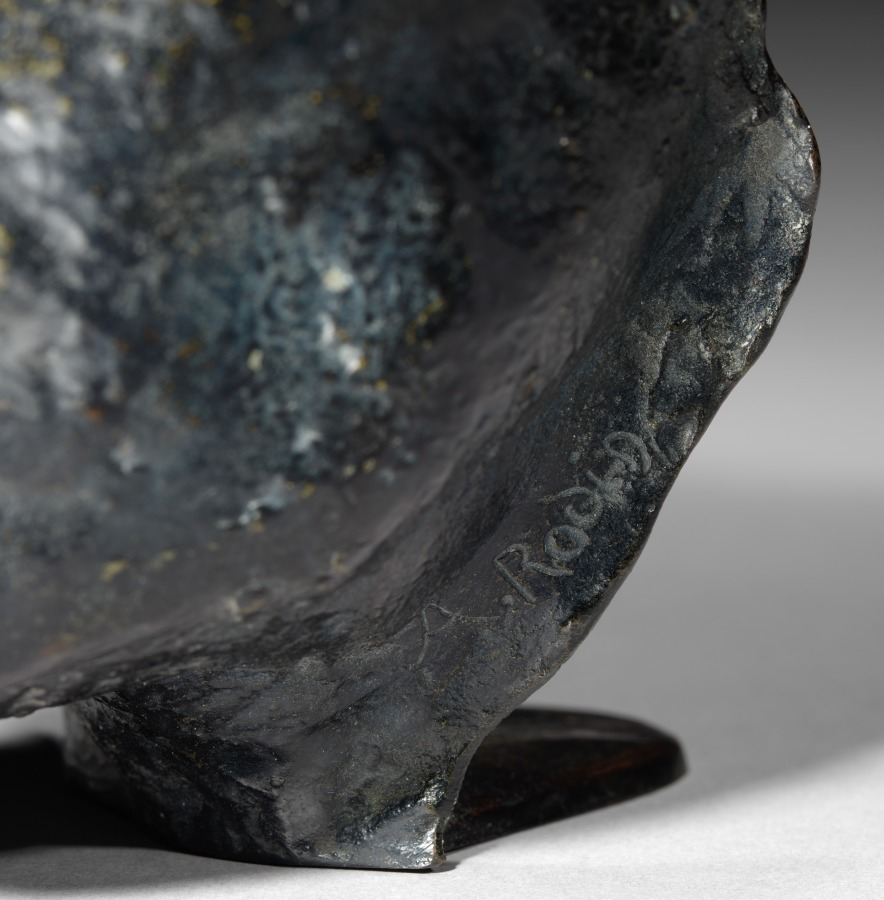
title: Mask of the Japanese Actress Hanako (Ohta Hisa)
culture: France, early 20th Century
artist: Auguste Rodin (French, 1840–1917)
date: 1908 (?)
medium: bronze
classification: Sculpture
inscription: Signed sinister side of neck: "A. Rodin"; inside sinister side in relief: "A. Rodin"